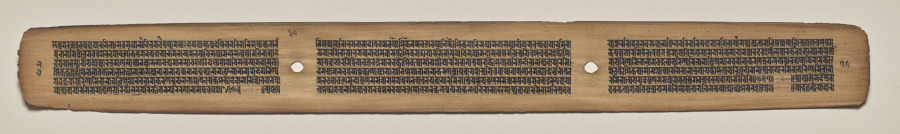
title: Text, Folio 35 (verso), from a Manuscript of the Perfection of Wisdom in Eight Thousand Lines (Ashtasahasrika Prajnaparamita-sutra)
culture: Eastern India, Bihar, Vikramashila Monastery. Painting: Nepal, Kathmandu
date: Sunday, September 14, 1119 (year 239 of the Newar Samvat in the month of Ashvina)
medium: gum tempera and ink on palm leaves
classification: Painting